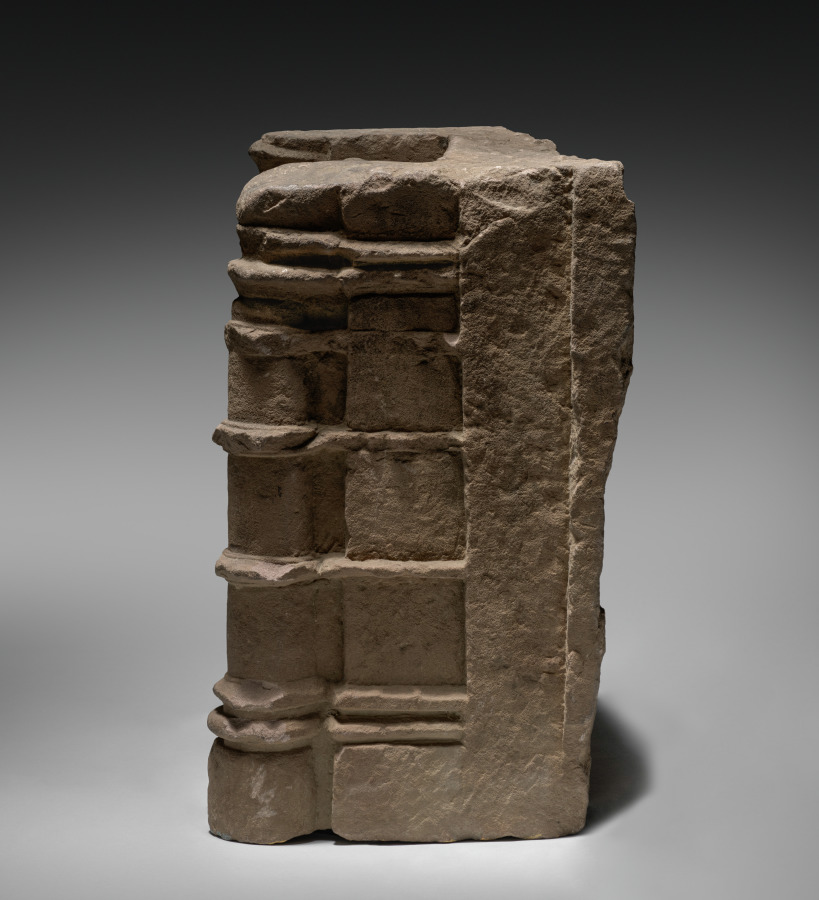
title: Eight Armed Shiva Dancing Between Two Pillars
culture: India, Rajasthan, Chandela Dynasty, 10th - 11th century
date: 900s–1000s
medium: sandstone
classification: Sculpture